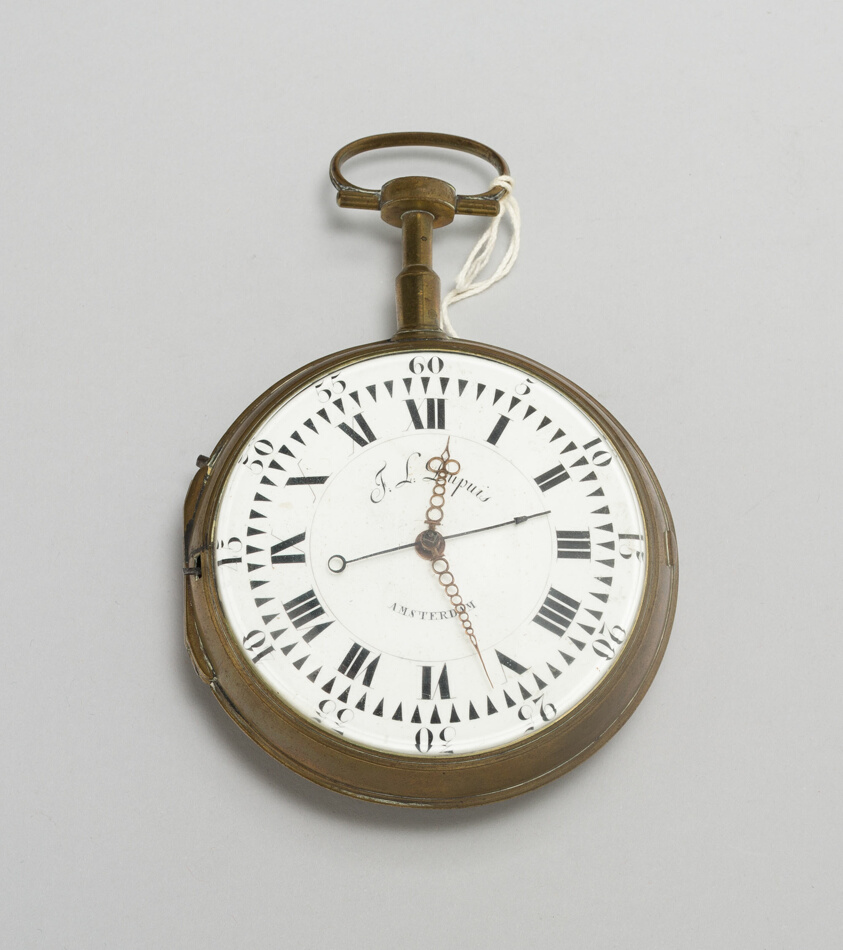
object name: Metalwork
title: Watch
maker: Jean Baptiste Daniel; French, 1849-1899; Amsterdam, Netherlands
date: Late 18th to early 19th century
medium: Brass and enamel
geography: Amsterdam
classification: watch; european decorative arts; metalwork